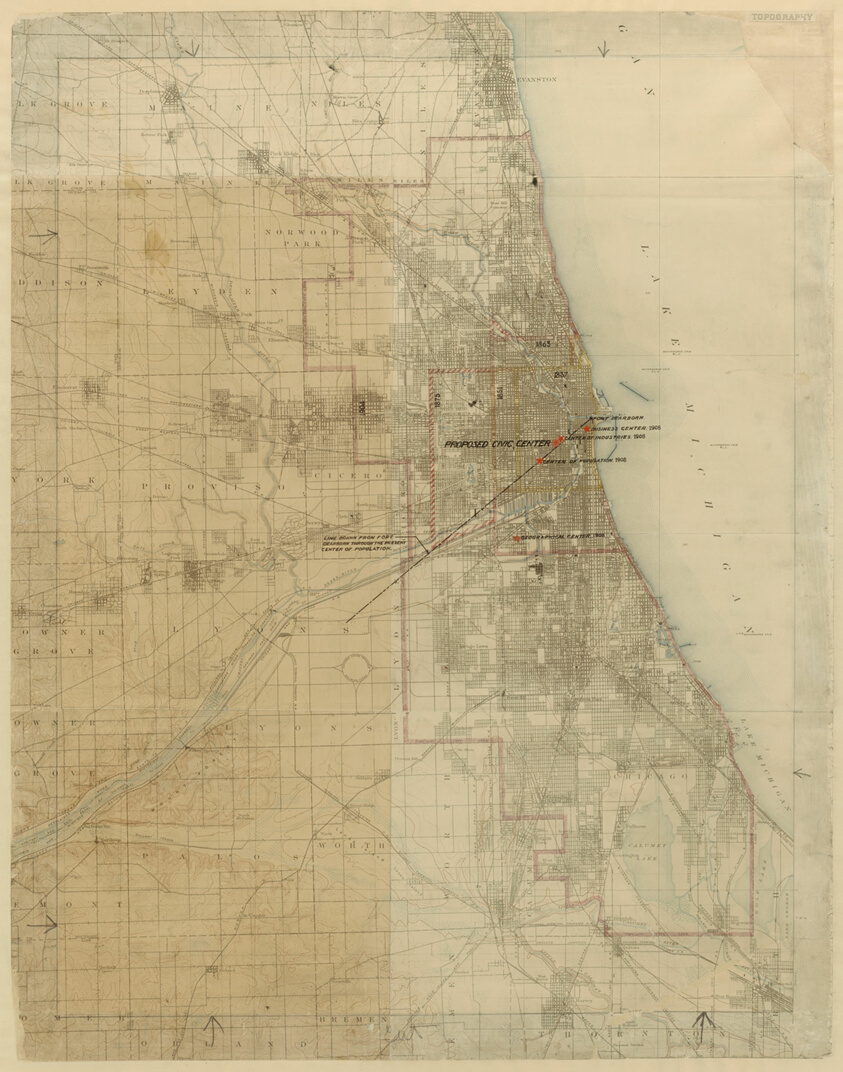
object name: Architectural Drawing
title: Plan of Chicago, Chicago, Illinois, Diagram Showing City Growth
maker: Daniel Hudson Burnham (American, 1846-1912); Edward Herbert Bennett (American, born England, 1874-1954)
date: 1909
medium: Colored ink, paint, and wash on a printed map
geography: Chicago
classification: design drawing; architectural drawing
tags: Chicago, architecture, city, diagram, drawing, illinois, lake, lakefront, map, Michigan, neighborhoods, plan